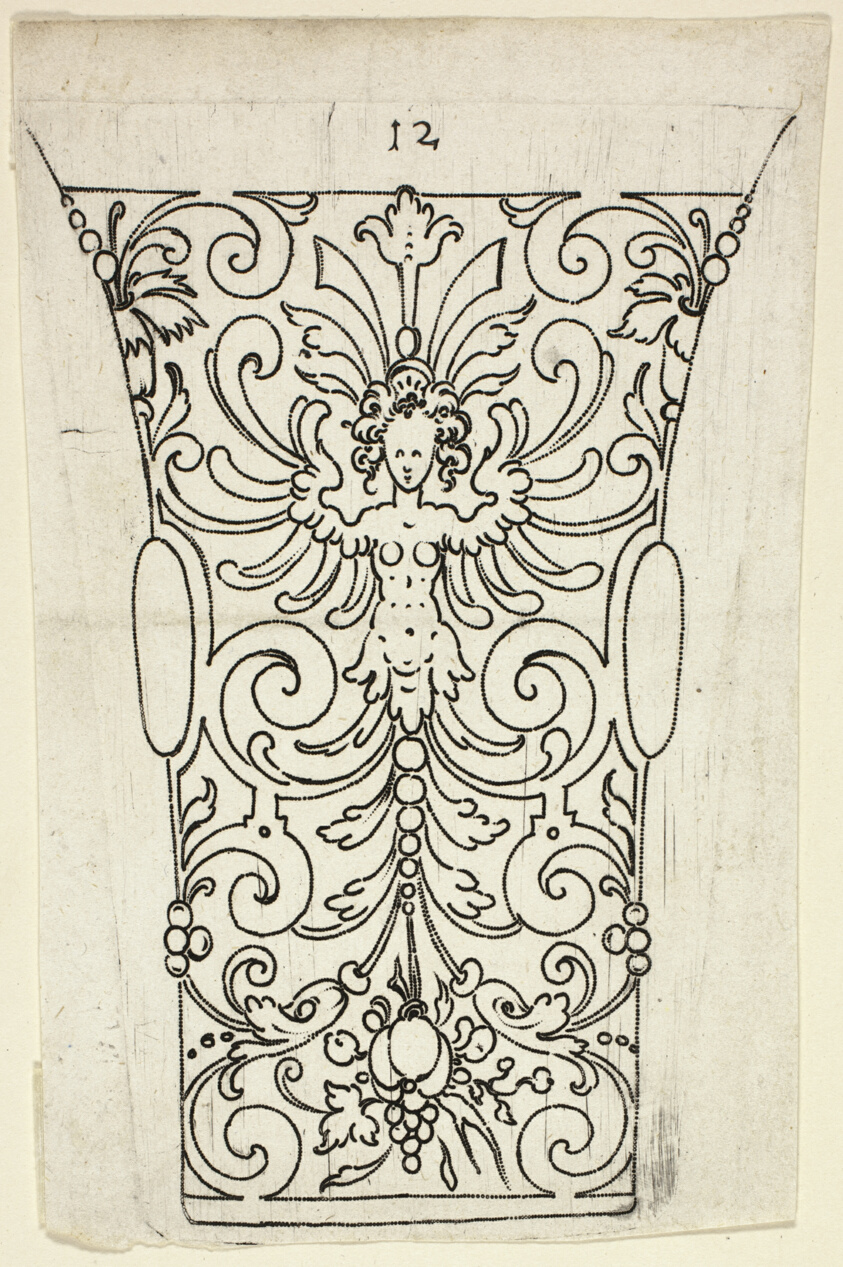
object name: Print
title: Plate 12, from XX Stuck zum (ornamental designs for goblets and beakers)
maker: Master A.P. (German, active early 17th century)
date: 1601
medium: Punch engraving in black on ivory laid paper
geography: Germany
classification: engraving; print; prints and drawing